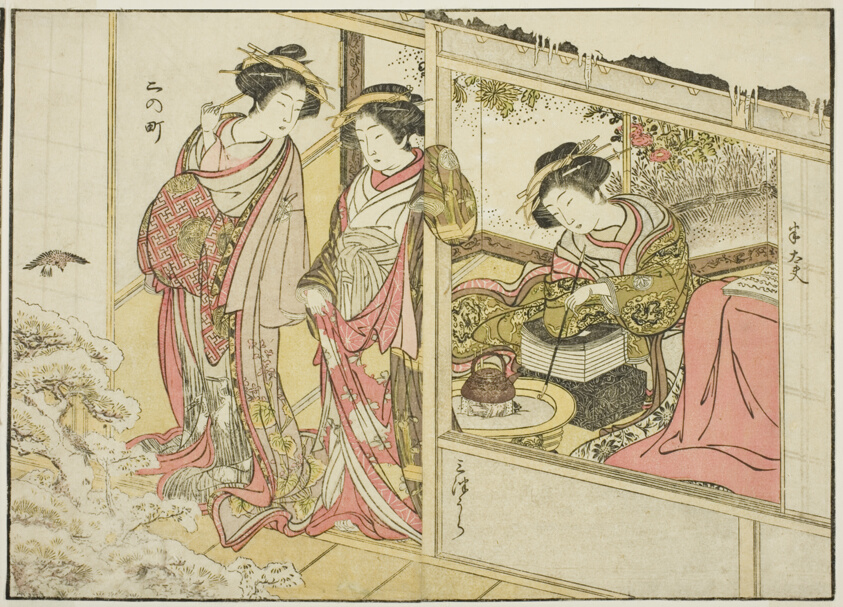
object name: Print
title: Courtesans of the Nakaomiya, from the book "Mirror of Beautiful Women of the Pleasure Quarters (Seiro bijin awase sugata kagami)," vol. 2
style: Japanese (culture or style)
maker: Katsukawa Shunsho; Japanese, 1726-1792; Kitao Shigemasa; Japanese, 1739-1820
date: 1776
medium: Color woodblock print; double-page illustration cut from a book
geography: Japan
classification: woodblock print; print; asian art